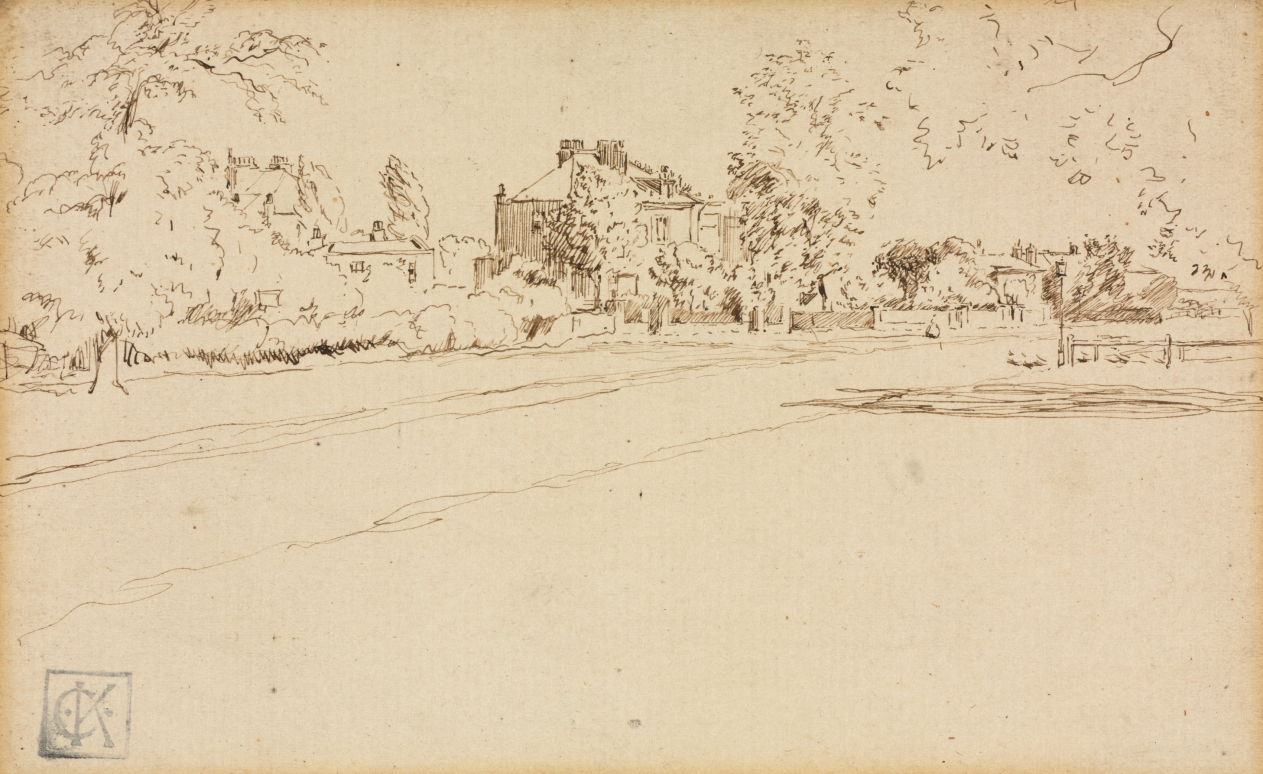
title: House in Hammersmith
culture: England, 19th century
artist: Charles Samuel Keene (British, 1823–1891)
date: c. 1842–91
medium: pen and ink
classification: Drawing